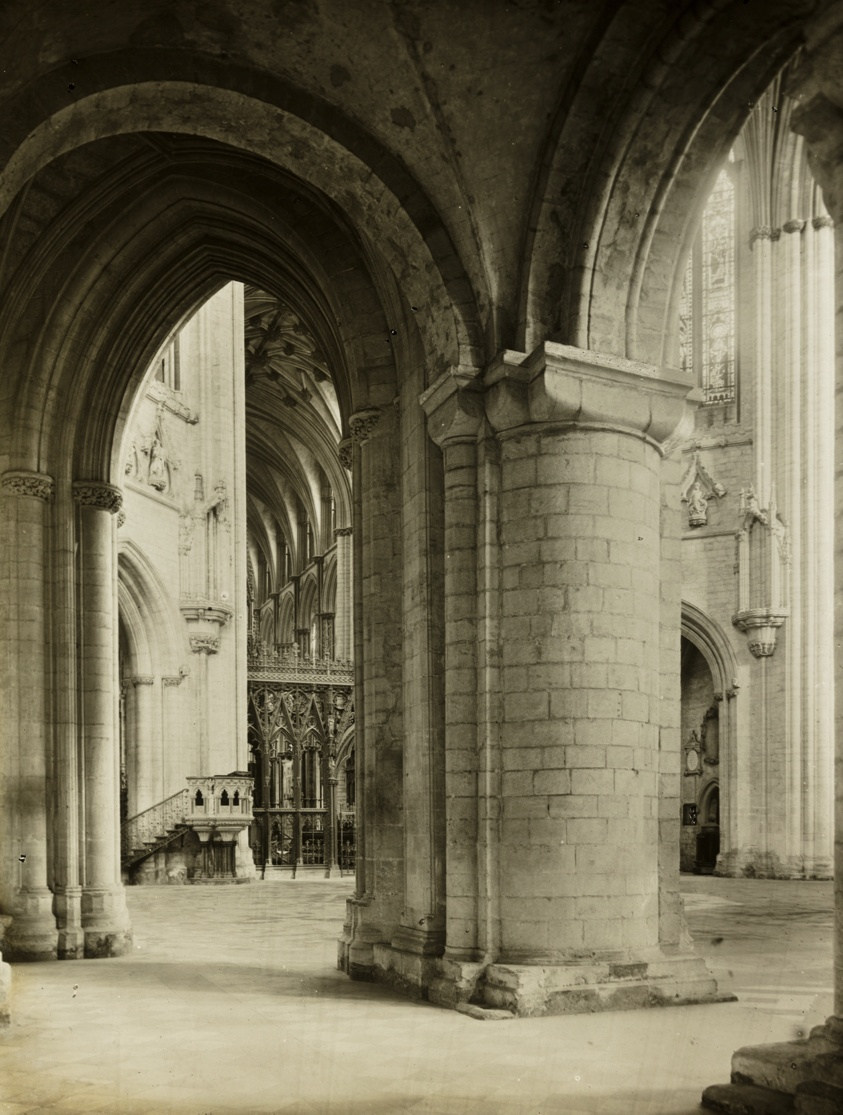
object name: Photograph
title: Ely Cathedral: Octagon from North Aisle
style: Pictorialism, 19th century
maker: Frederick H. Evans (English, 1853–1943)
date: c. 1891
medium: Lantern slide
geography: England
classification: photograph; photography